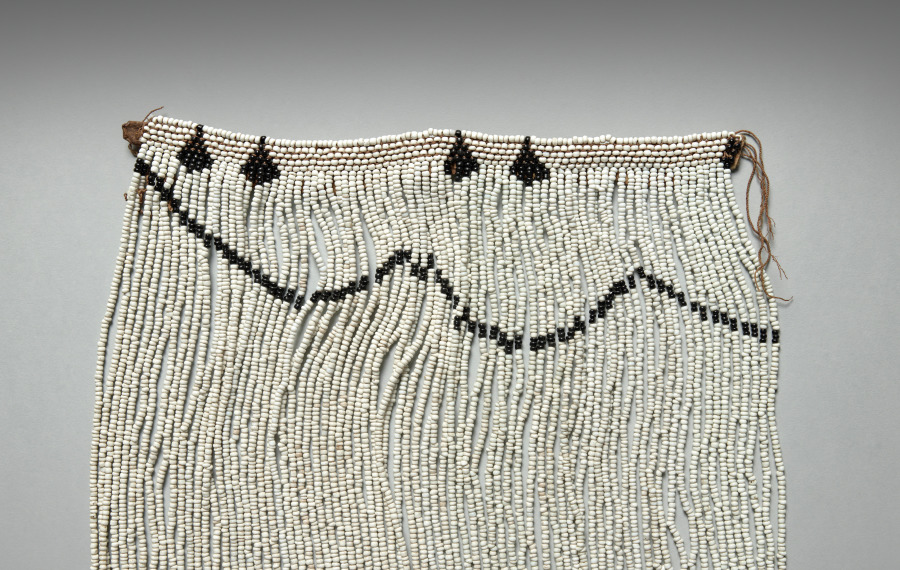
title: Royal ceremonial beadwork: breast cover (incebetha)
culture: Africa, Southern Africa, South Africa, Southeast Cape Region, Unknown female Xhosa-style maker(s)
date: 1800s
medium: Glass beads, hide, and sinew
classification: Textile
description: Elite Xhosa women once wore beaded garments like this on festive occasions. Made almost completely from imported Venetian or Bohemian glass beads, they were overt status symbols. Imported beads functioned as money for the Xhosa between about 1770 and 1829. These garments’ female maker carefully selected beads of the highest quality, uniform in color, shape, and size. Made in the same shape as the pendant, a swallowtail-shaped apron (CMA 2010.206) worn under the skirt completed the ensemble.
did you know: The beads to make an ensemble like this cost several cattle in the early nineteenth century, an amount most couldn't afford.